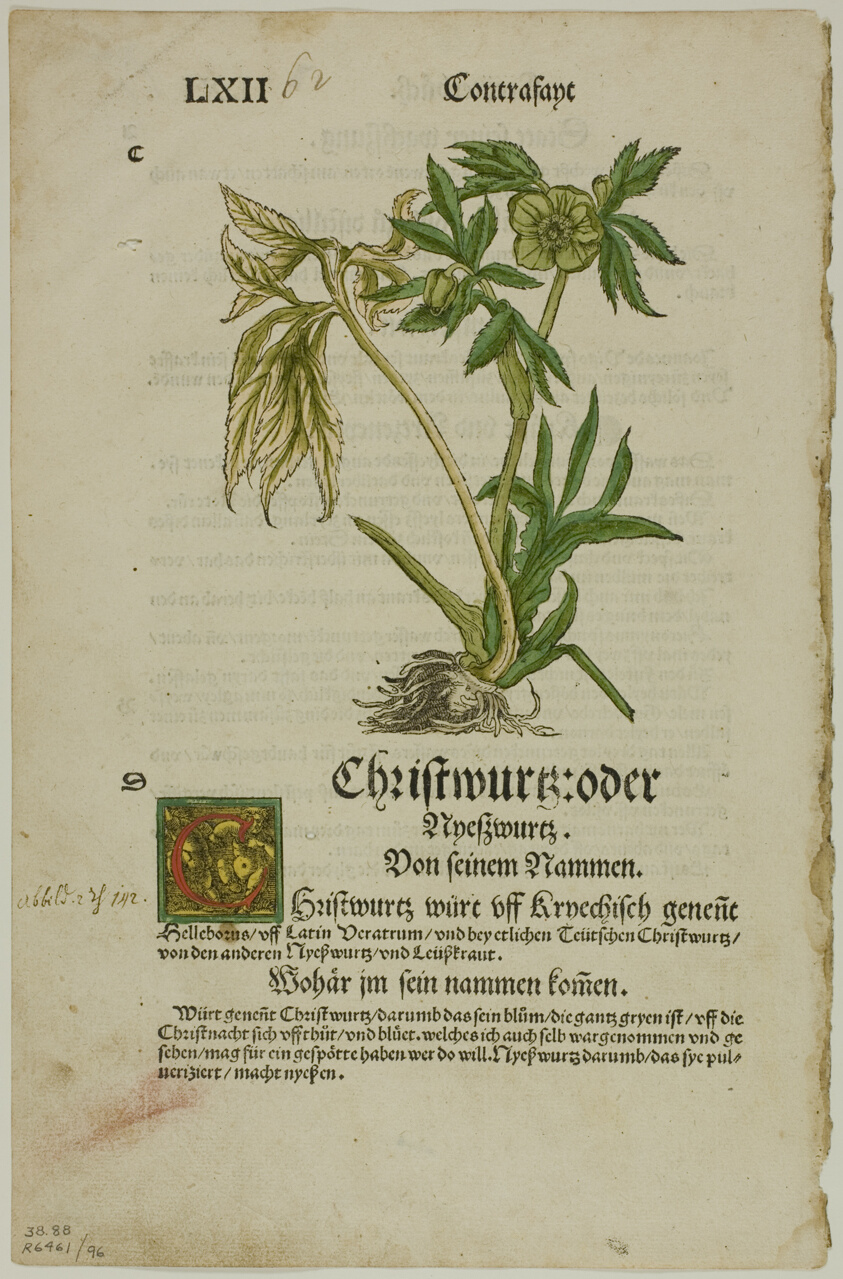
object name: Print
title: Christwurz (Hellebore) from Herbarium (Kräuterbuch), plate 96 from Woodcuts from Books of the XVI Century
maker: Hans Weiditz II (Master of Petrarch) (German, c.1495-1536); assembled by Max Geisberg (Swiss, 1875-1943)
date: 1532, assembled into portfolio 1937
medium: Hand-colored woodcut on paper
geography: Germany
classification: woodcut; print; prints and drawing